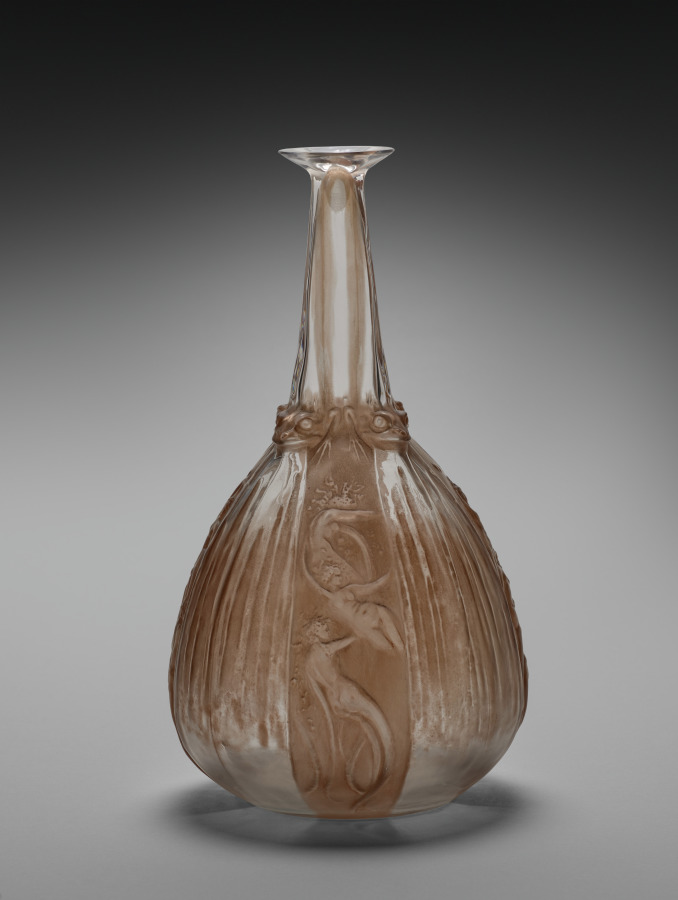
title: Mermaids and Frogs Decanter (Carafe sirènes et grenouilles)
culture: France, 20th century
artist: René Lalique (French, 1860–1945)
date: 1917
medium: glass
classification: Glass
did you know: The title of this work translates to mermaids and frogs carafe.